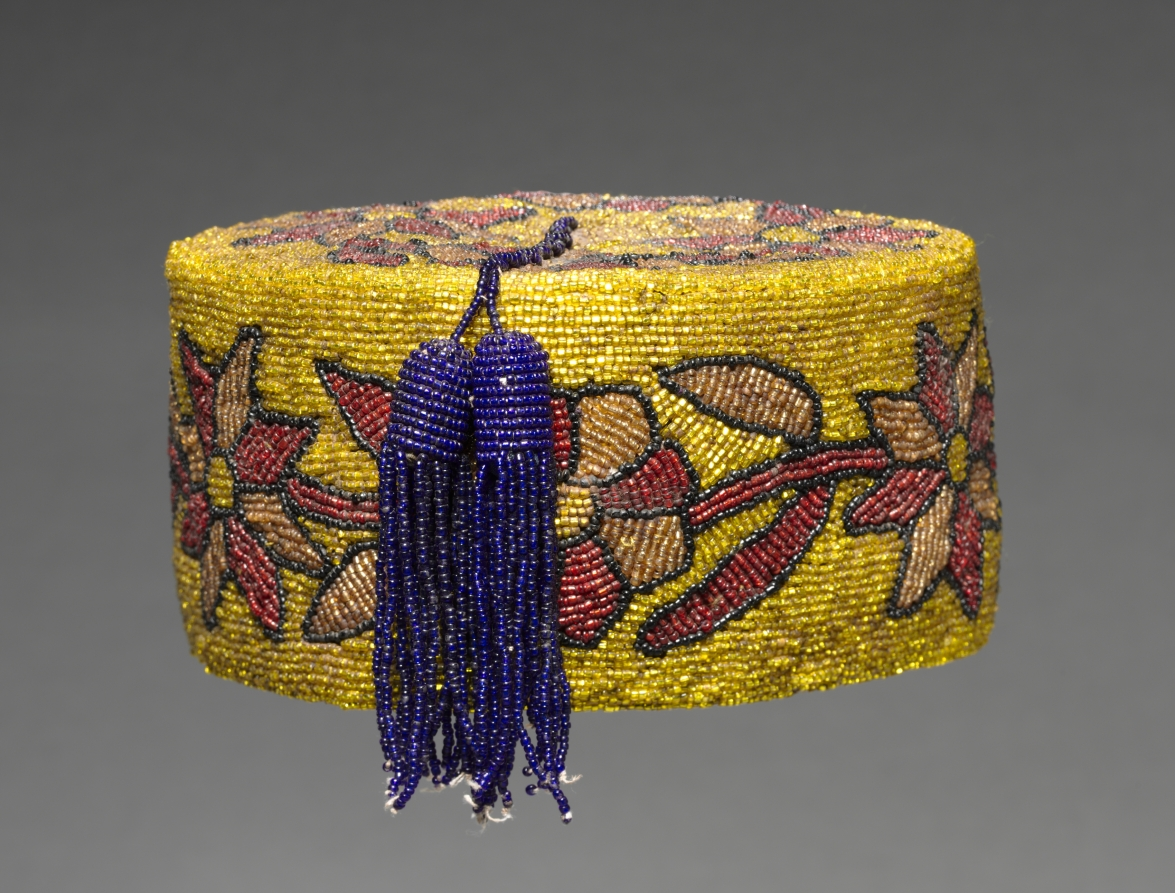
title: Coronet (oríkògbófo)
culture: Africa, West Africa, Nigeria, Yorùbá-style maker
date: 1900s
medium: Cloth, glass beads, and thread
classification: Garment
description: Like the rare conical crown (ade), the coronet (oríkògbófo) may only be worn by a king descended from Oduduwa, the first king of the Yorùbá. While the crown is reserved for special occasions, the coronet may be used by the king for less formal public events and when entertaining non-Yorùbá visitors. It signifies wealth rather than royal status.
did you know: The beads on this sculpture were imported, likely from Venice or Bohemia (now called the Czech Republic).